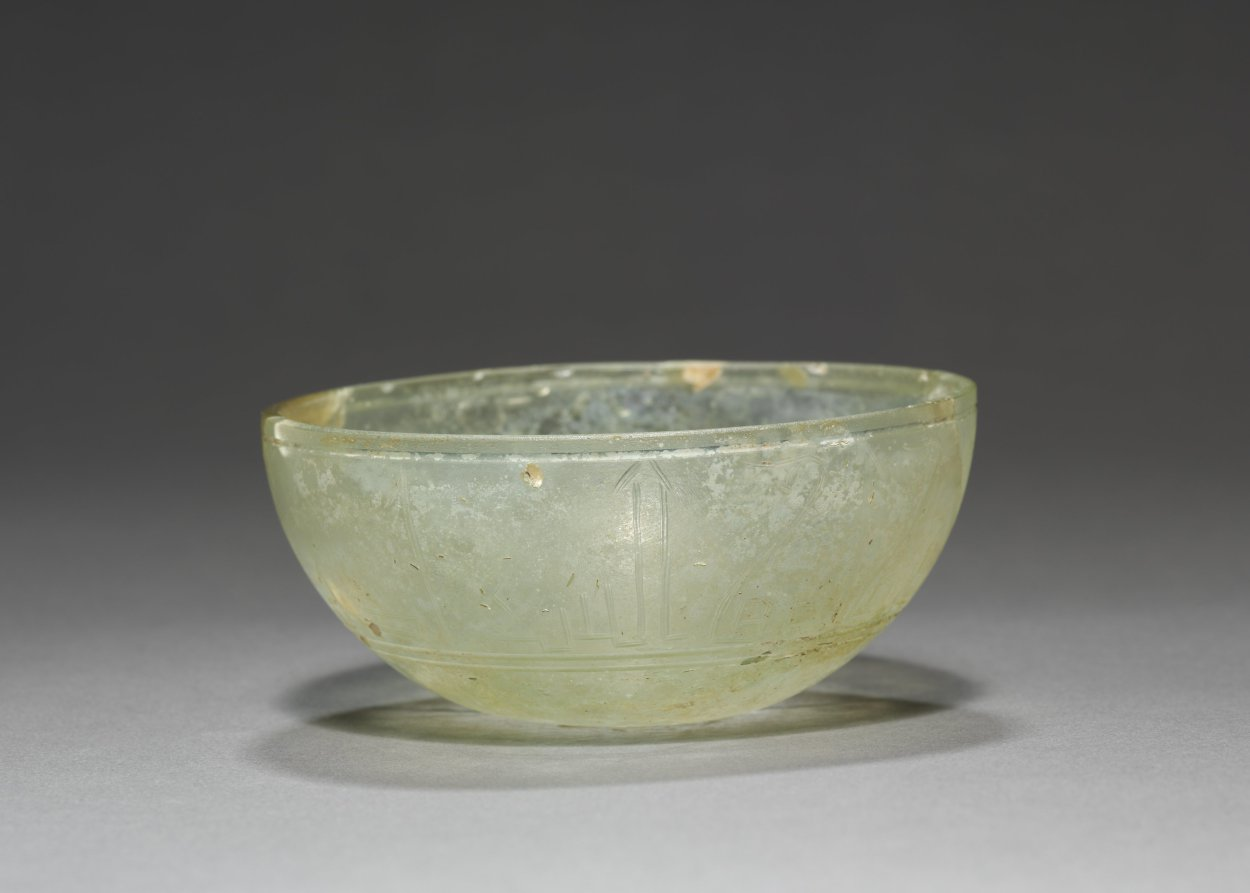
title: Bowl with Incised Inscription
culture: Iraq, Abbasid Period, 9th Century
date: 800s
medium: glass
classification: Glass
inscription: The inscription translates: "Felicity, Glory, Happiness"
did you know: The incised inscription, which translates as "Felicity, Glory, Happiness," is an early type of Kufic of which very few examples survive.